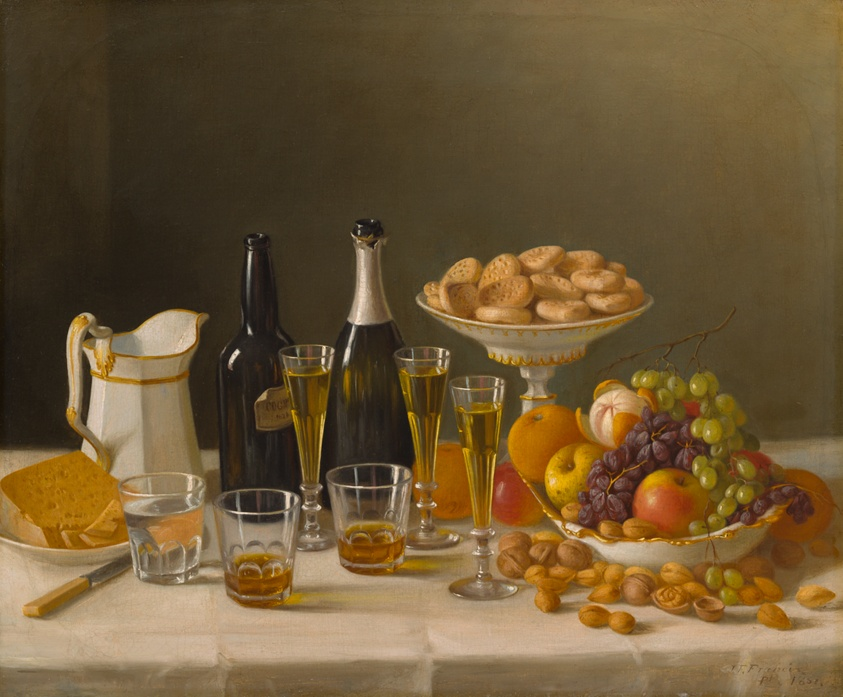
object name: Painting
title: Wine, Cheese, and Fruit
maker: John F. Francis (American, 1808–1886)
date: 1857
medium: Oil on canvas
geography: Pennsylvania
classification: painting; american arts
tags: still life, dining, drinking